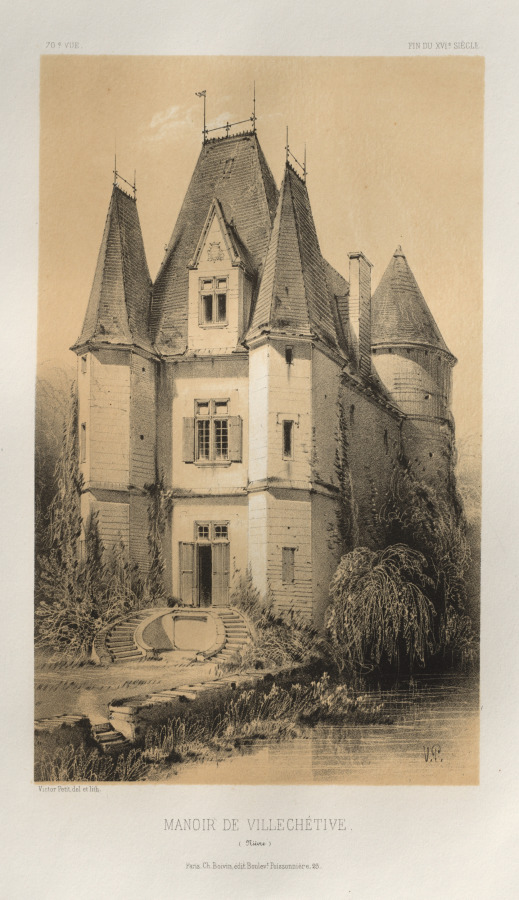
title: Architecture Pittoresque ou Monuments des XVeme. Et XVIeme. Siecles: Chateaux de France des XV et XVI Siecles: Pl. 70, Manoir De Villechétive (Nièvre)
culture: France, 19th century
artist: Victor Petit (French, 1817–1874)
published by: Charles Boivin (publisher and editor); Lith de Godard a Paris (printer)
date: 1860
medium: lithograph with tint stone, from portfolio of 100 lithographs with tint stone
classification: Print